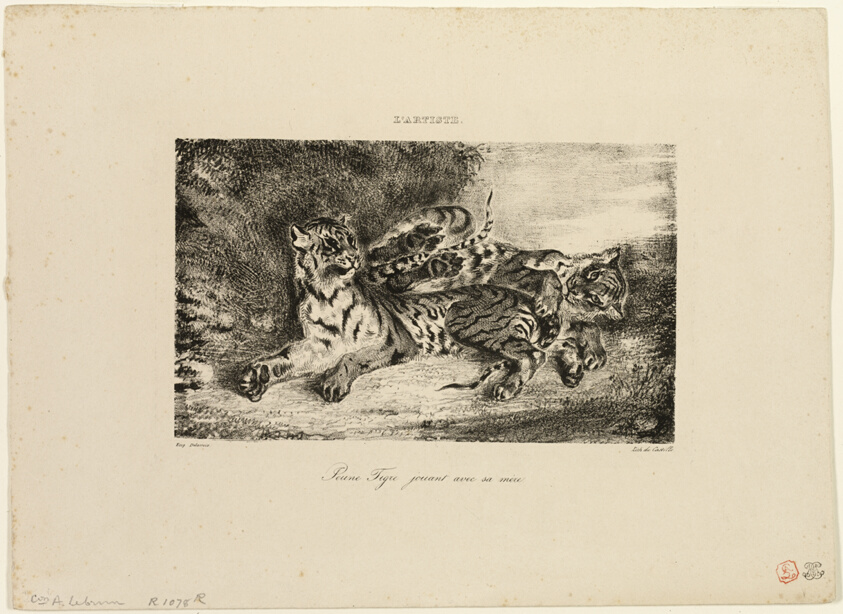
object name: Print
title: Young Tiger Playing with Its Mother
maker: Eugène Delacroix (French, 1798-1863); printed by Castille (French, 19th century)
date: 1831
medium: Lithograph in black on buff wove paper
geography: France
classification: lithograph; print; prints and drawing